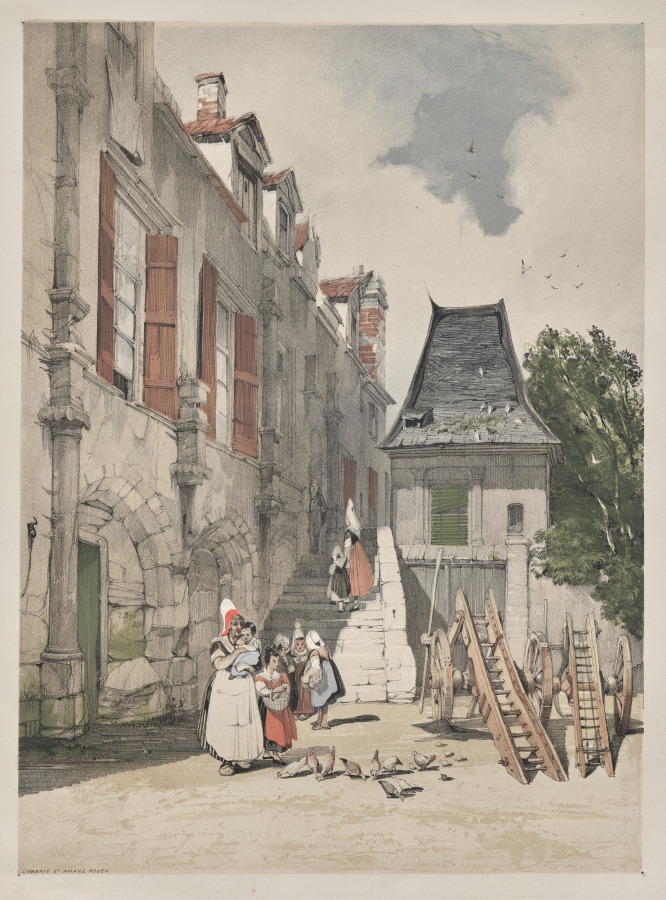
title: Picturesque Architecture in Paris, Ghent, Antwerp, Rouen: L'Abbaye St. Amand, Rouen, France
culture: England, 19th century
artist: Thomas Shotter Boys (British, 1803–1874)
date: 1839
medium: lithograph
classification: Portfolio